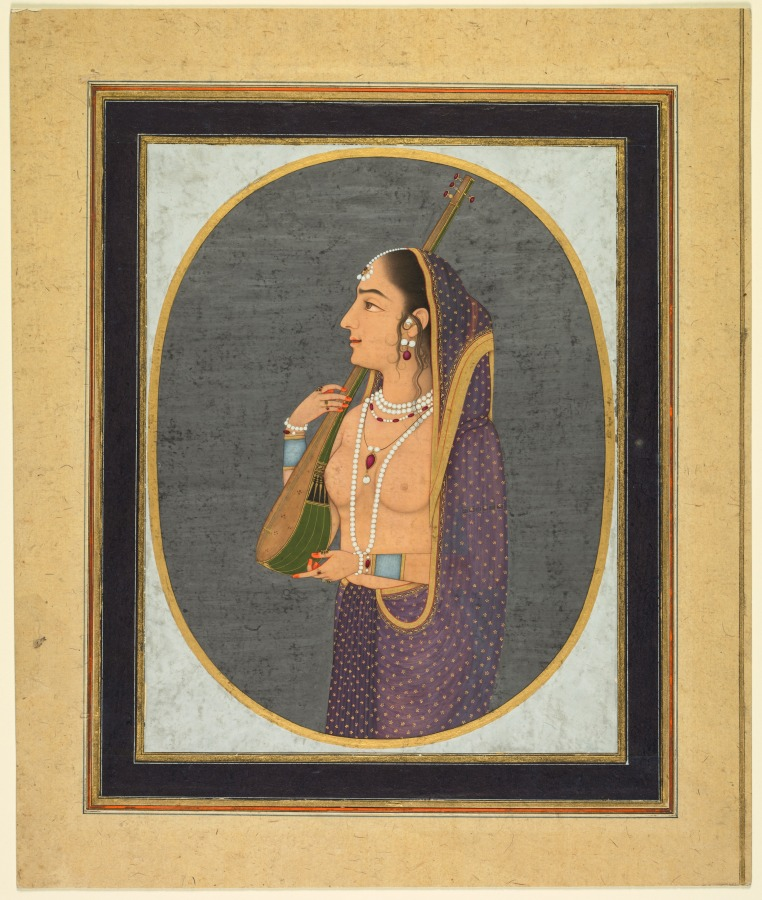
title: Court lady singing and playing the vina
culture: India, Mughal, 18th century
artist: attributed to Muhammad Rizavi Hindi (Indian, active mid-1700s)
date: c. 1760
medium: Gum tempera, ink, and gold on paper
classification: Painting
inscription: Verso: Persian verses in nasta‘liq script. Once again ‘Iraqi broke his vows:/ From the cup of love he became intoxicated and ecstatic.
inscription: Verso: Persian verses in nasta‘liq script. Until you are bold enough to take to the seas,/ You will not reap spiritual benefits from your inner heart./ Until you have pitched your tent next to the spiritual guide/ You will not enjoy him to the fullest.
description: Her mouth open slightly in song, the woman’s hennaed fingers strum a three-string vina, an Indian musical instrument with a resonator made from a gourd. Music was an essential component of courtly entertainment, along with the drinking of wine and the appreciation of poetry, paintings, and jewels. On the verso, the first two lines in Persian read: Once again, Iraqi broke his vows: From the cup of love he became intoxicated and ecstatic. The excerpt from the mystic poet Jami is more of a pious injunction: Until you are bold enough to take to the seas, You will not reap spiritual benefits from your inner heart. Unless you pitch your tent next to the spiritual guide, You will not enjoy him to the fullest.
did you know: When the mouth is open, and teeth and tongue are showing, she is singing.